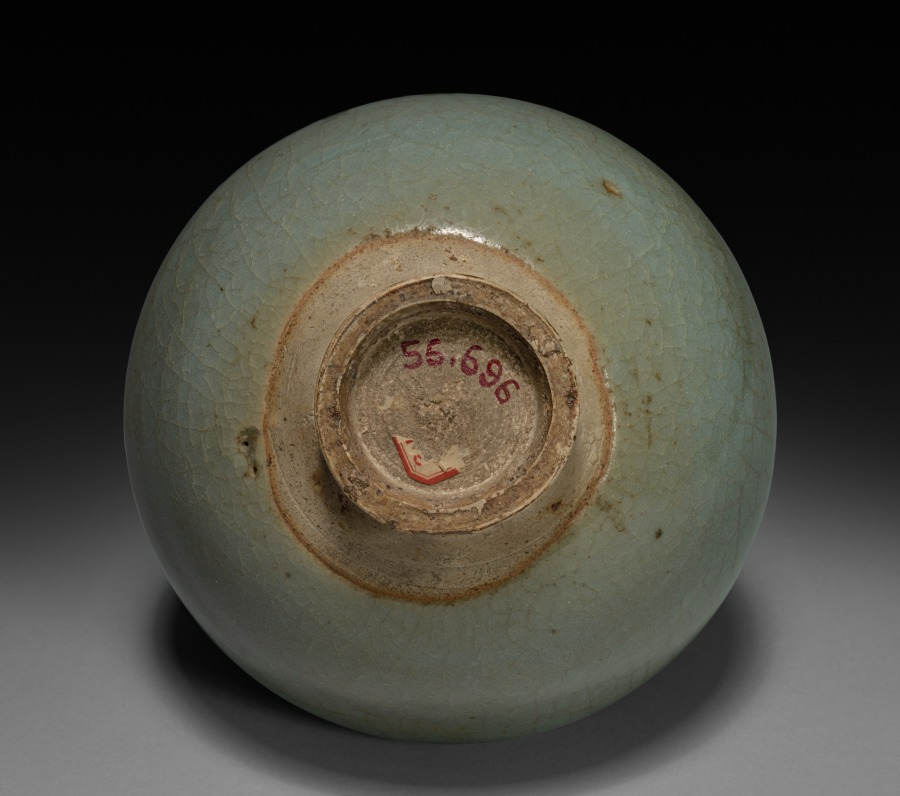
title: Bowl: Jun ware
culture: Northern China, Jin dynasty (1115-1234) - Yuan dynasty (1271-1368)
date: 13th - 14th century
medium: glazed buff stoneware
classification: Ceramic